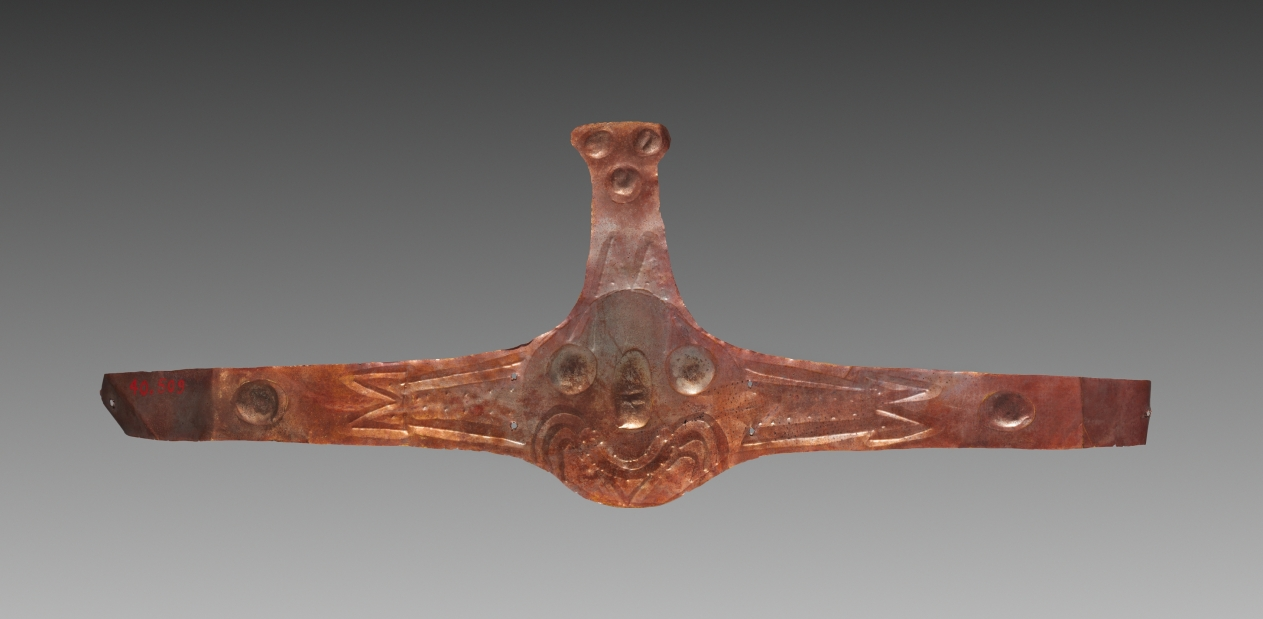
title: Forehead Ornament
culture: Peru, South Coast, Nasca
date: 100 BCE–700 CE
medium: hammered gold alloy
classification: Jewelry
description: Nasca figures, like one on a bowl nearby, are shown wearing such forehead ornaments and mouth masks similar to these. The mouth mask hung from the nasal septum, the oval opening surrounding the mouth and the bristles positioned as feline whiskers, here transformed to serpents. Both were cut from sheet gold; details were worked freehand while the sheet rested on a soft surface.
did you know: Tumbaga is an alloy made by blending gold with copper, which may give the gold a rosy hue.